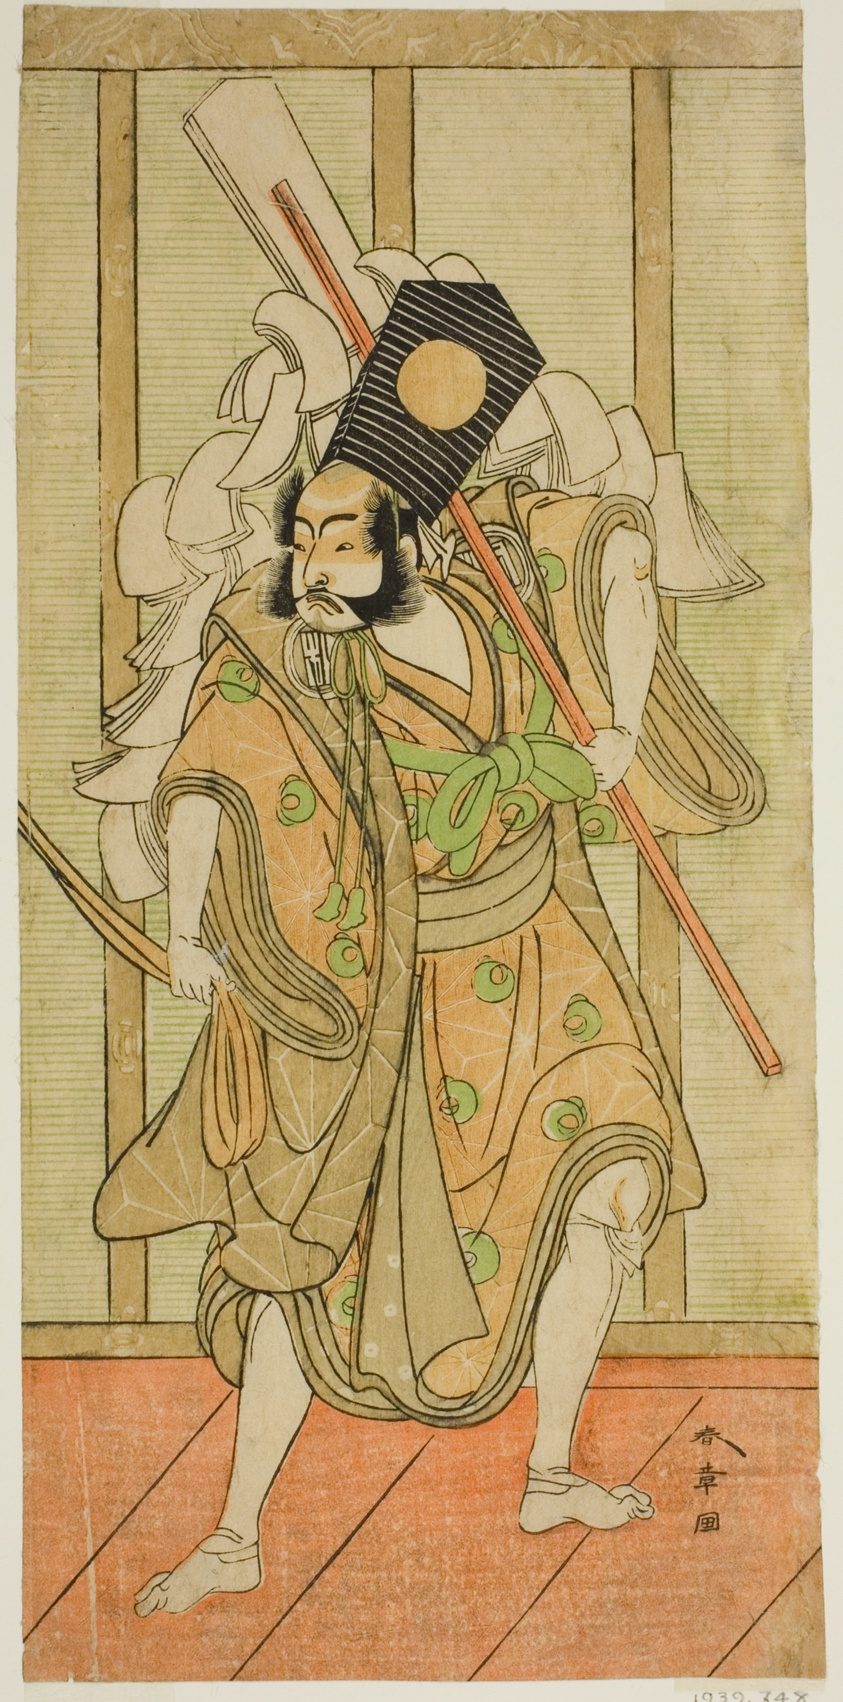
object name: Print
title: The Actor Arashi Sangoro II as Asahina Saburo in the Play Iro Maki-e Soga no Sakazuki, Performed at the Morita Theater in the First Month, 1773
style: Japanese (culture or style)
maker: Katsukawa Shunsho 勝川 春章; Japanese, 1726-1792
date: c. 1773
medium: Color woodblock print; hosoban; right sheet of diptych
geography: Japan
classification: woodblock print; print; asian art